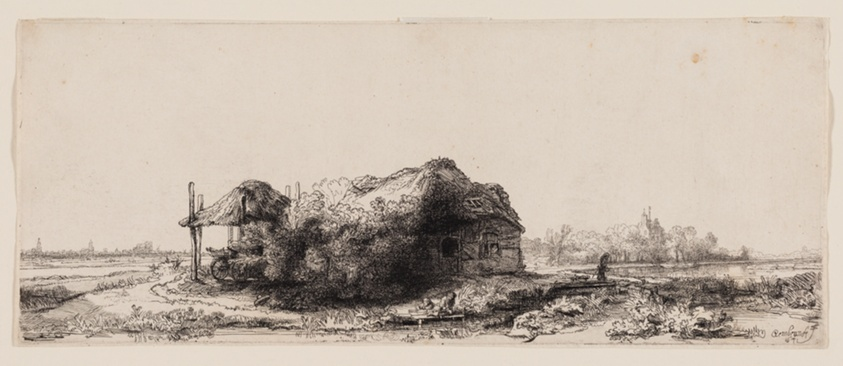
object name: Print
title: Landscape with Cottages and a Hay Barn: Oblong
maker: Rembrandt van Rijn (Dutch, 1606-1669)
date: 1641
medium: Etching on off-white laid paper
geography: Holland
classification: etching; print; prints and drawing; paper